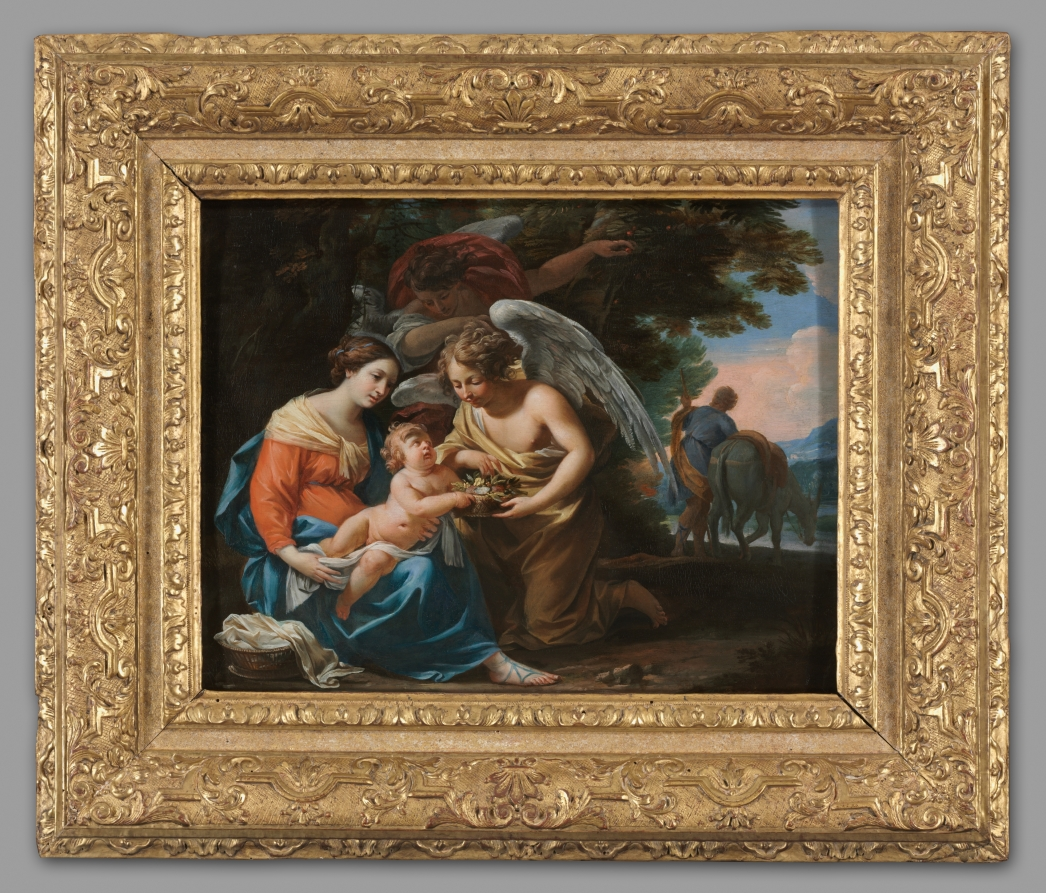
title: Rest on the Flight into Egypt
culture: France, 17th century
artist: Charles Poërson (French, 1609–1667)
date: c. 1640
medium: oil on wood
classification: Painting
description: Formerly ascribed to the French painter Simon Vouet (1590-1649), Rest on the Flight into Egypt has only recently been attributed to Poerson, a collaborator and follower of Vouet. Intended to be a small devotional picture, this painting on oak panel depicts a quiet scene of the Holy Family resting; the Virgin Mary sits while an angel brings the plump young Christ Child fruit, and St. Joseph leads their donkey away to graze. The delicate pinks and blues and the transparent treatment of light and shadow create a gentle domestic atmosphere, characteristic of Vouet's Italian-influenced work.